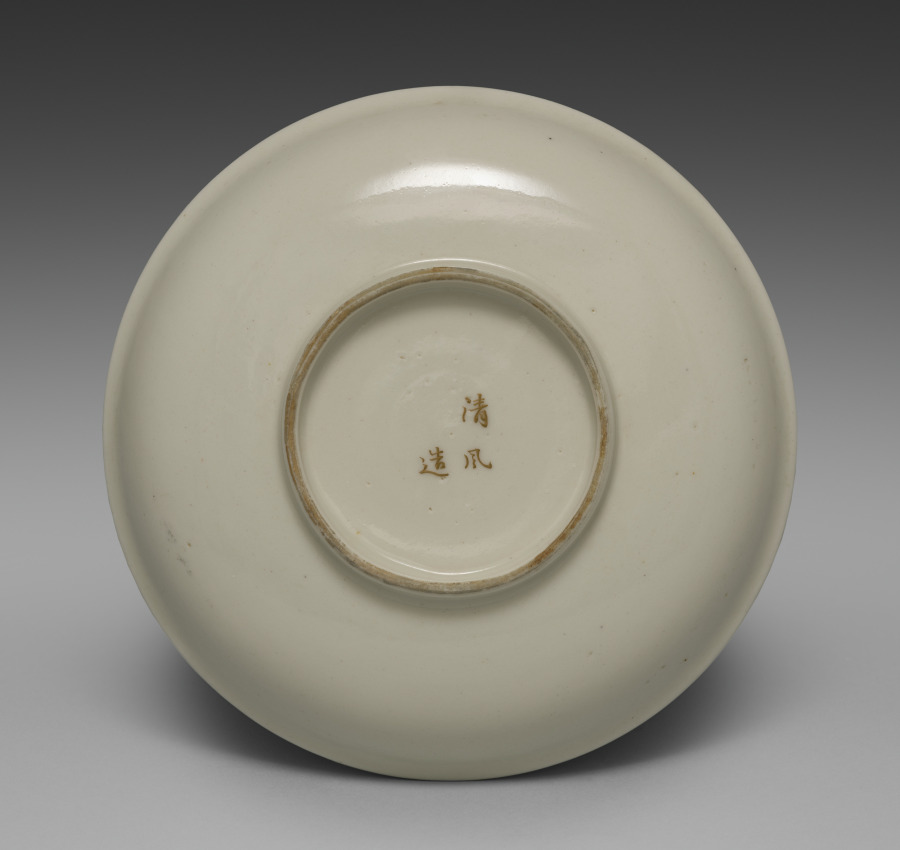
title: Medium-sized Dish from Dining Set with Plum Blossoms and Cracked-Ice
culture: Japan, Meiji period (1868–1912)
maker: Seifū Yohei II (Japanese, 1844–1878)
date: c. 1875–78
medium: Porcelain with molded designs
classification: Ceramic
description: Each item in this set has a delicate low-relief design of flowering plum branches over scattered, intersecting lines meant to resemble the cracked-ice surface of a frozen body of water and is signed on the base in gold pigment. While Yohei II produced many fine works in underglaze blue, like those produced by Kiyomizu Shichibei, he also made works in quite different styles later in his career, from the early 1870 s. In 1873, he was appointed purveyor to the Industrial Center of Kyoto Prefecture, a designation associated with Kyoto’s efforts to reach an international market through the port of Kobe; and from 1875 until his death, he was involved in national-level projects to present Japanese ceramics across the world. It was during this period that Yohei III was apprenticed to Yohei II, and it has been suggested that this set may in fact be an early example of Yohei III’s work, which he signed with his teacher’s name. Decorated with flowers resembling Japanese textile motifs, the set calls to mind the design of Yohei II’s pair of vases with plum blossoms in the Victoria and Albert Museum. Here, the elaborate trees created for a formal public exhibition setting have been translated into the approachable blossoms of the genteel domestic environment. While the designs are consistent across the pieces, each raised flower petal and pistil and each incised line in the ice was done by hand, so the cups, bowls, and dishes are similar yet unique. The bottoms of two boxes once identified the set’s owner, but the information has been deliberately obscured with black ink. However, inscriptions still visible appear to indicate two occasions, once at the end of July 1886 , and once again in June 1916 , when parts of the set were requested from Hokura in Niigata Prefecture. The location corresponds to a neighborhood in the present-day city of Jōetsu. The surname Tsuji 辻 also appears on a paper tag affixed to one of the box cloths. Future research may possibly reveal more about their provenance. A vase by Yohei III in a private collection combines the formal grandeur of the Yohei II vases in the Victoria and Albert Museum with the gentler design of this dining set, placing flowering plum trees against soft, scalloped-edge clouds resembling those in golden screens.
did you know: The dining wares have a creamy white coloration that the four boxes containing them identify as Korean in style.